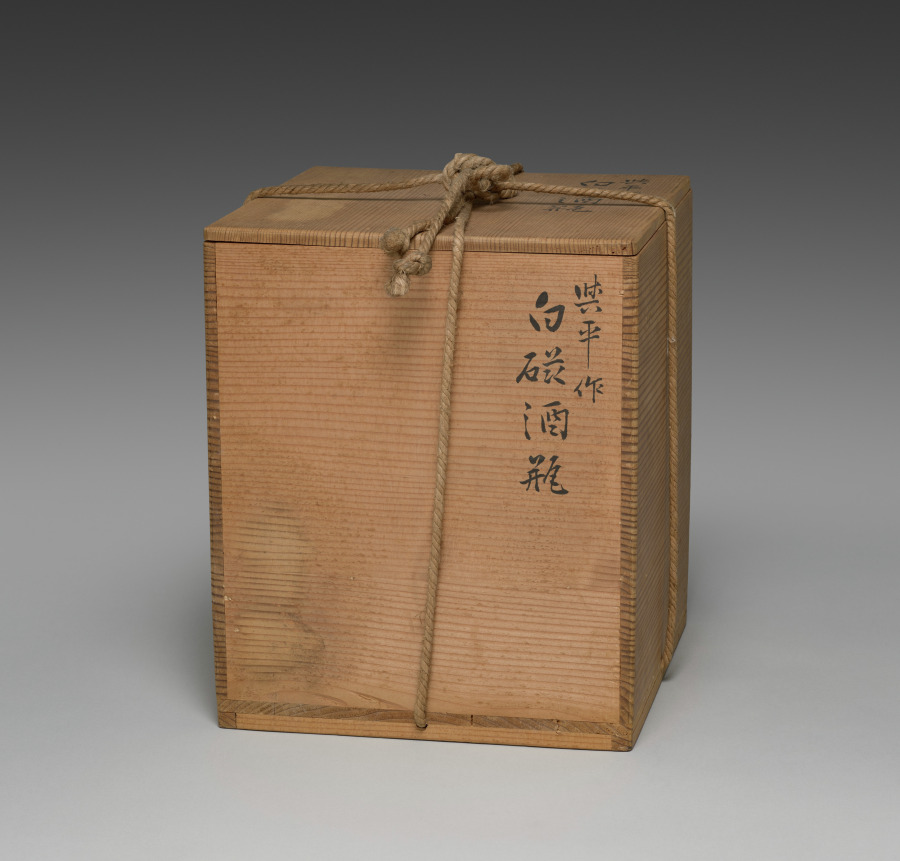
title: Sake Pourer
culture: Japan, Meiji period (1868–1912)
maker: Seifū Yohei III (Japanese, 1851–1914)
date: c. 1887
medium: Porcelain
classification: Ceramic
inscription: Artist's signature in underglaze blue on the base.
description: This sake pourer has a wide basin with a low foot; a generous spout open across the top half; a flat, round lid with a small knob recessed flush to the top of the container; and a tall, arched handle that meets the container where the top joins the basin at a sharp angle. This vessel is glazed but otherwise undecorated. Unlike the creamy white color of some Yohei III works, the white of this sake pourer has the bluish cast typical of porcelains produced in Kyoto.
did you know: Seifū Yohei III signed this sake pourer in underglaze blue on the base.